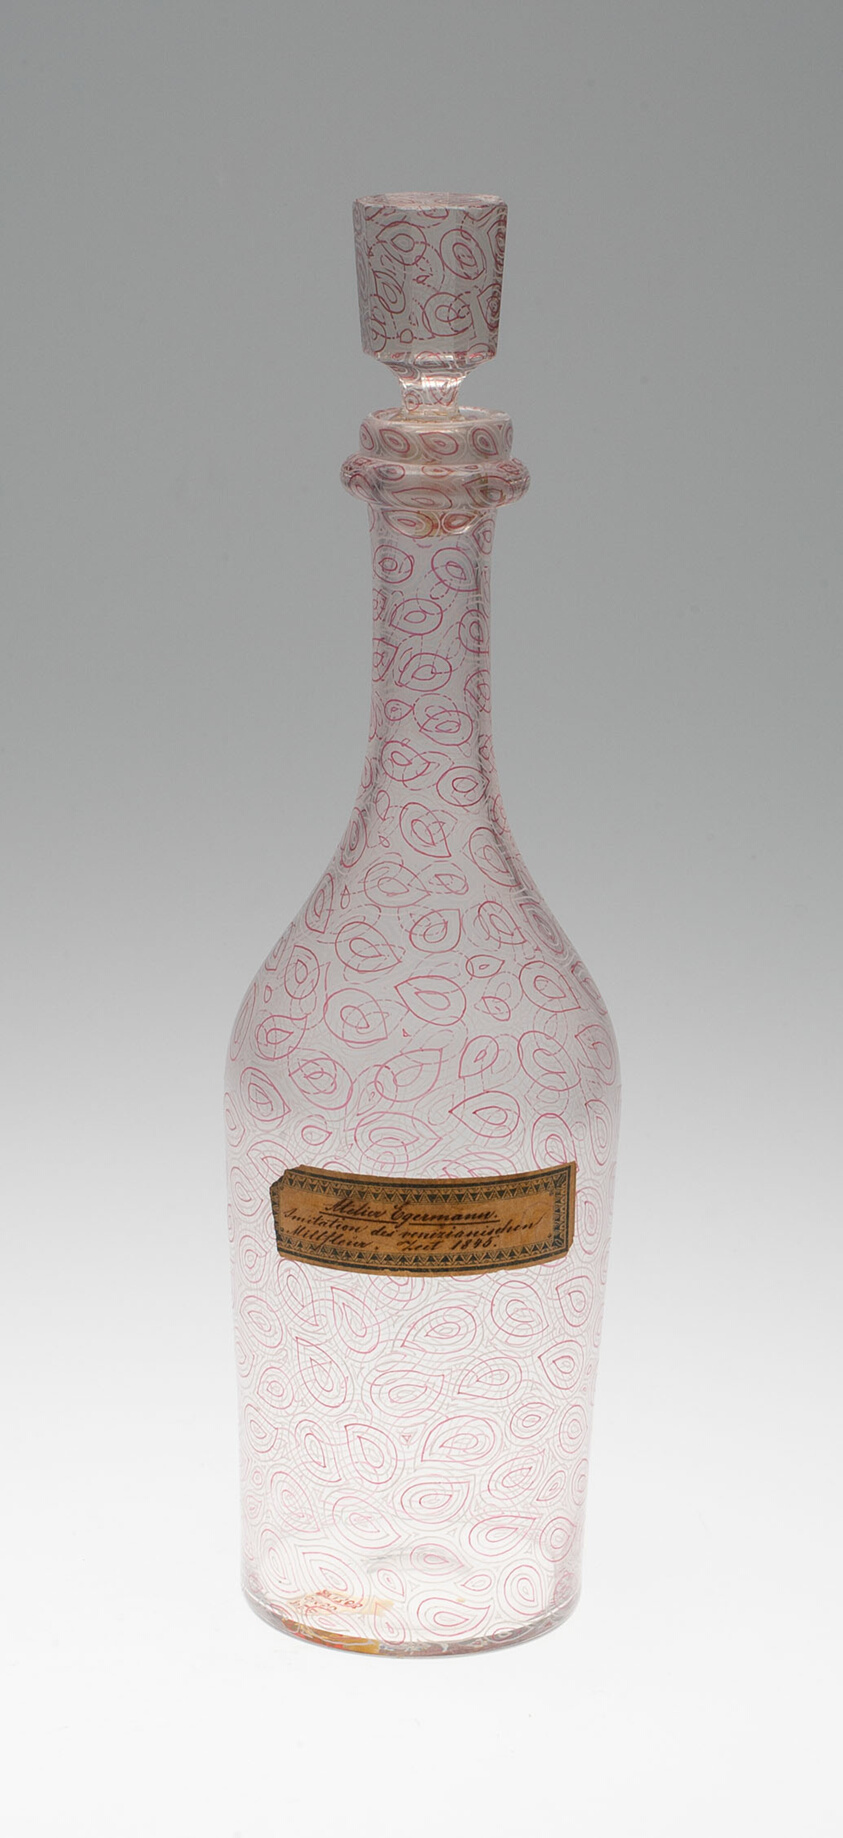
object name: Glass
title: Carafe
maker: Bohemia, Czech Republic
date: 1845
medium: Glass; red and white enamels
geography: Bohemia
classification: glass; european decorative arts